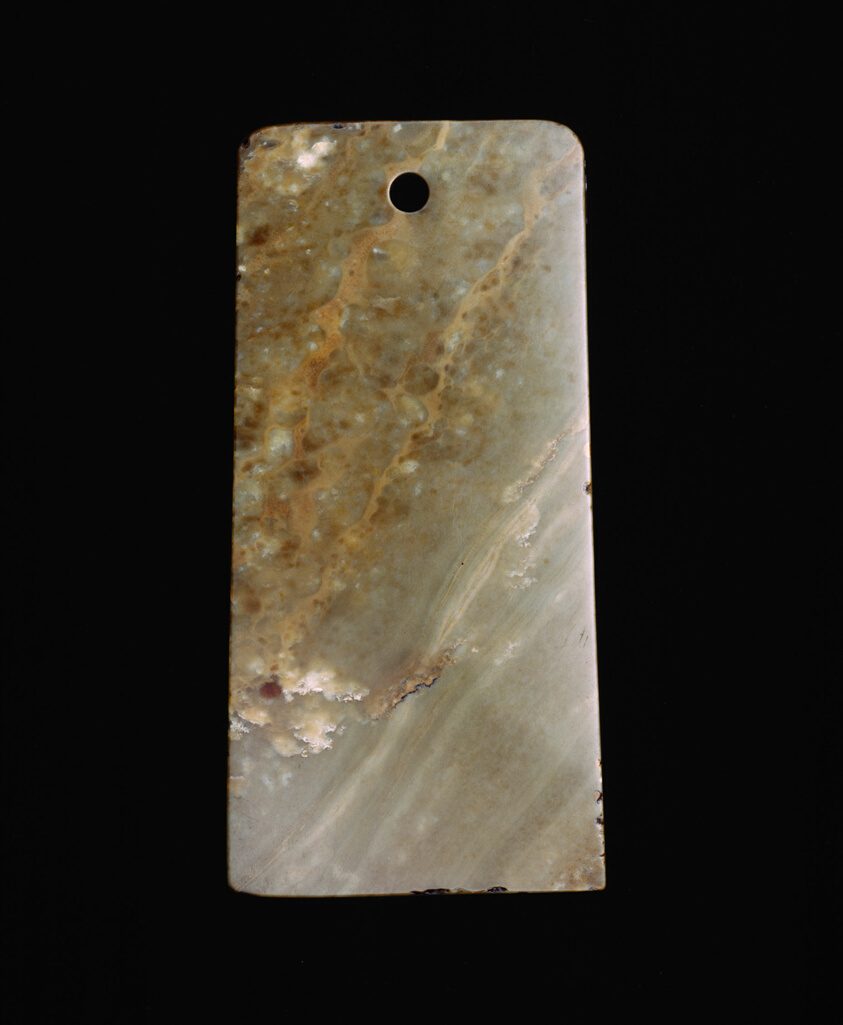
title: Axe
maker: China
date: Shang dynasty (c. 1600–1046 B.C.)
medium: Jade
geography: China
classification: jade; asian art